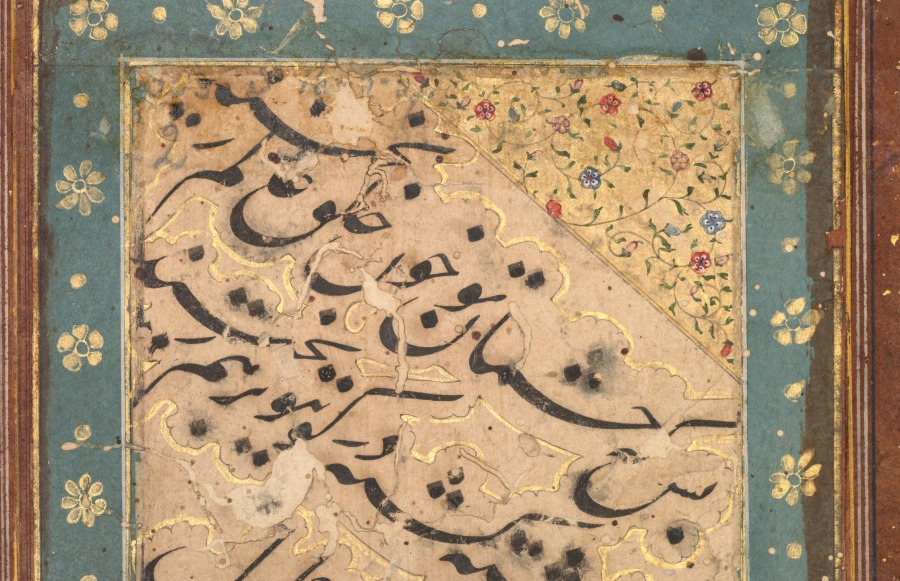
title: Calligraphy of a Quatrain (verso)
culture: India, Farrukhabad, Mughal, 18th century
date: c. 1760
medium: Gum tempera, ink, and gold on paper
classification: Calligraphy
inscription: Persian verse in nasta‘liq script: Your eyes have shed so much blood in the world at large/ That around your home corpses are strewn together in disorderly piles./ A hundred thousand faces were cast into molds of loveliness and beauty/ But rarely came out stamped as comely as you.